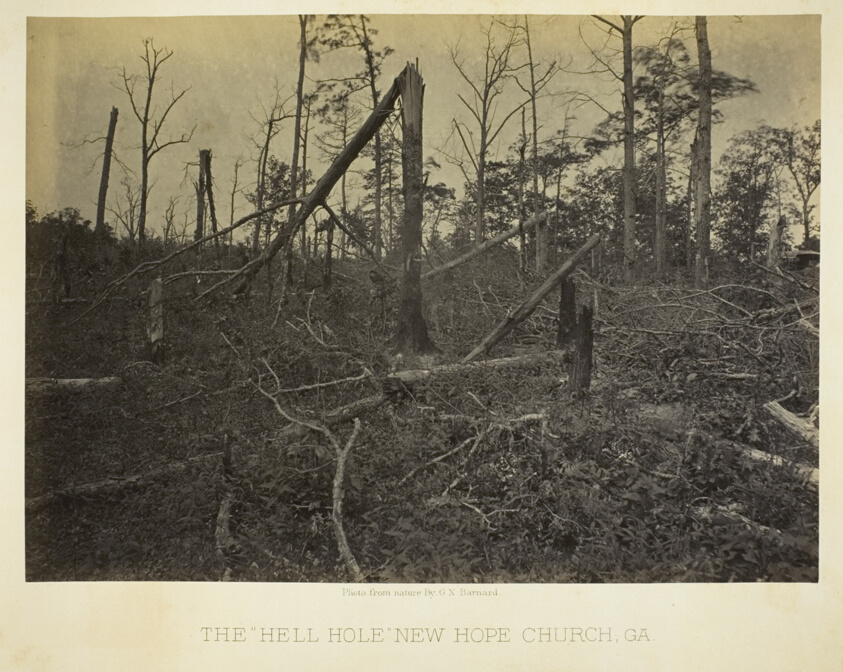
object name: Photograph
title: The "Hell Hole," New Hope Church, GA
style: 19th century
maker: George N. Barnard (American, 1819–1902)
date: 1866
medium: Albumen print, plate 27 from the album "Photographic Views of the Sherman Campaign" (1866)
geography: United States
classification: albumen silver print; photographic process; photography; photograph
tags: Collected by Hugh Edwards, Sherman's Campaign 1866